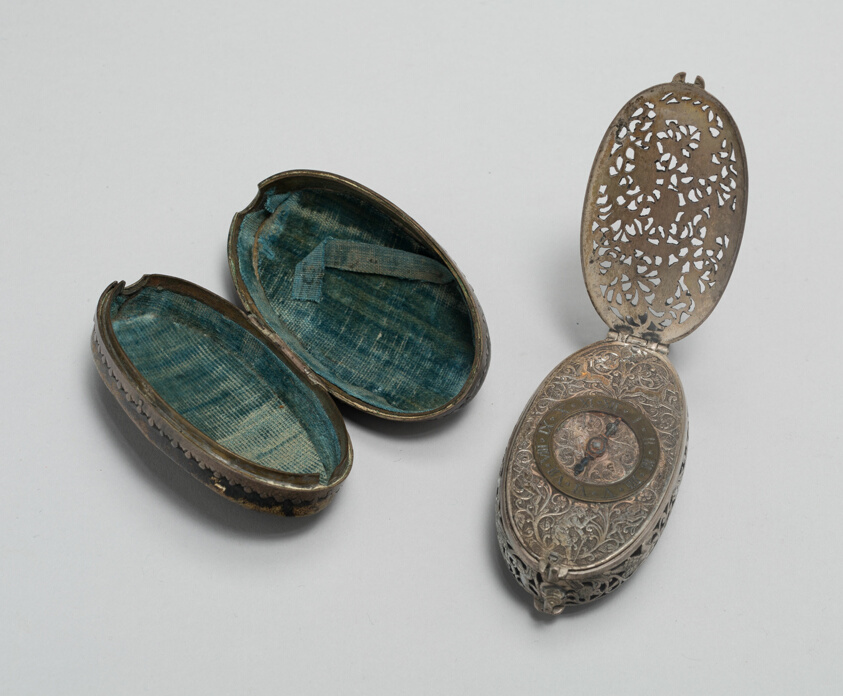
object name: Metalwork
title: Egg-Type Watch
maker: Nicklaus Rugend; German, 1585-1658; Augsburg, Germany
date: c. 1740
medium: Silver, brass, leather, and metal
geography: Augsburg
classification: silver; metal; watch; european decorative arts; metalwork